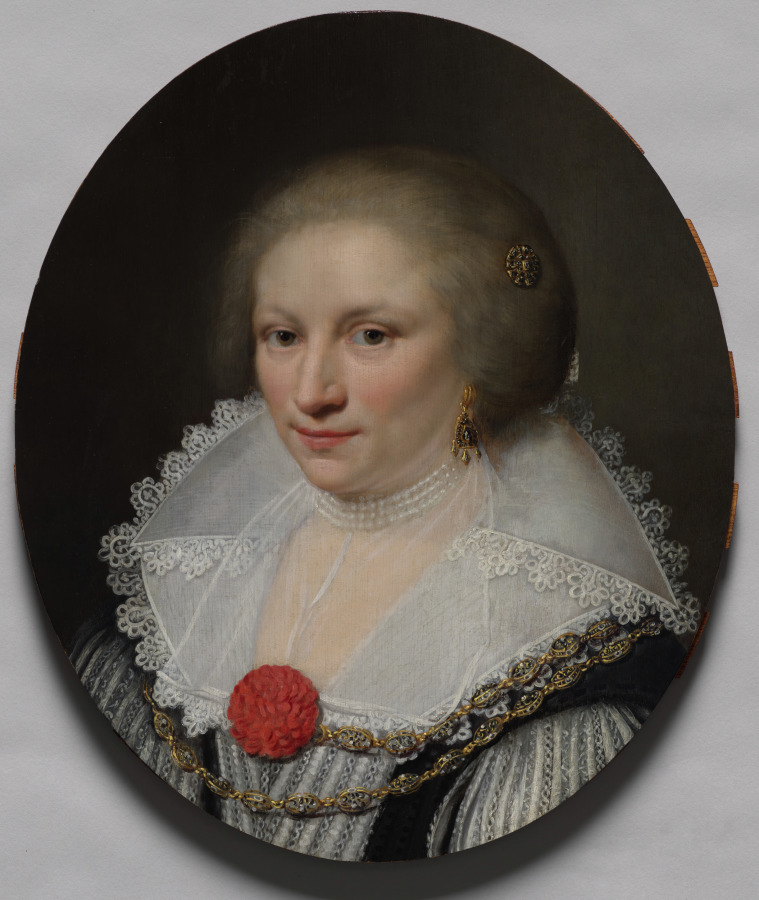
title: Portrait of a Woman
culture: Netherlands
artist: Jan Anthonisz. van Ravesteyn (Dutch, c. 1570–1657)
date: 1620s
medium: oil on wood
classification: Painting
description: How do you conserve a painting when portions are missing? The mid-treatment image (below) shows the painting after cleaning, when earlier restorations had been removed. In the painting on view, notice how the conservator reconstructed portions of the sitter’s lace collar and elaborate necklace. She re-created missing passages after studying the artist’s technique in other works and carefully emulating his treatment of the remaining lace and elements of the twisting, three-dimensional necklace. Conversely, there was not enough information to reconstruct what was probably another ornament at the back of the sitter’s head, so the decision was made not to speculate and invent something in that space.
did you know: The sitter wears several transparent and translucent white collars that become opaque when layered.